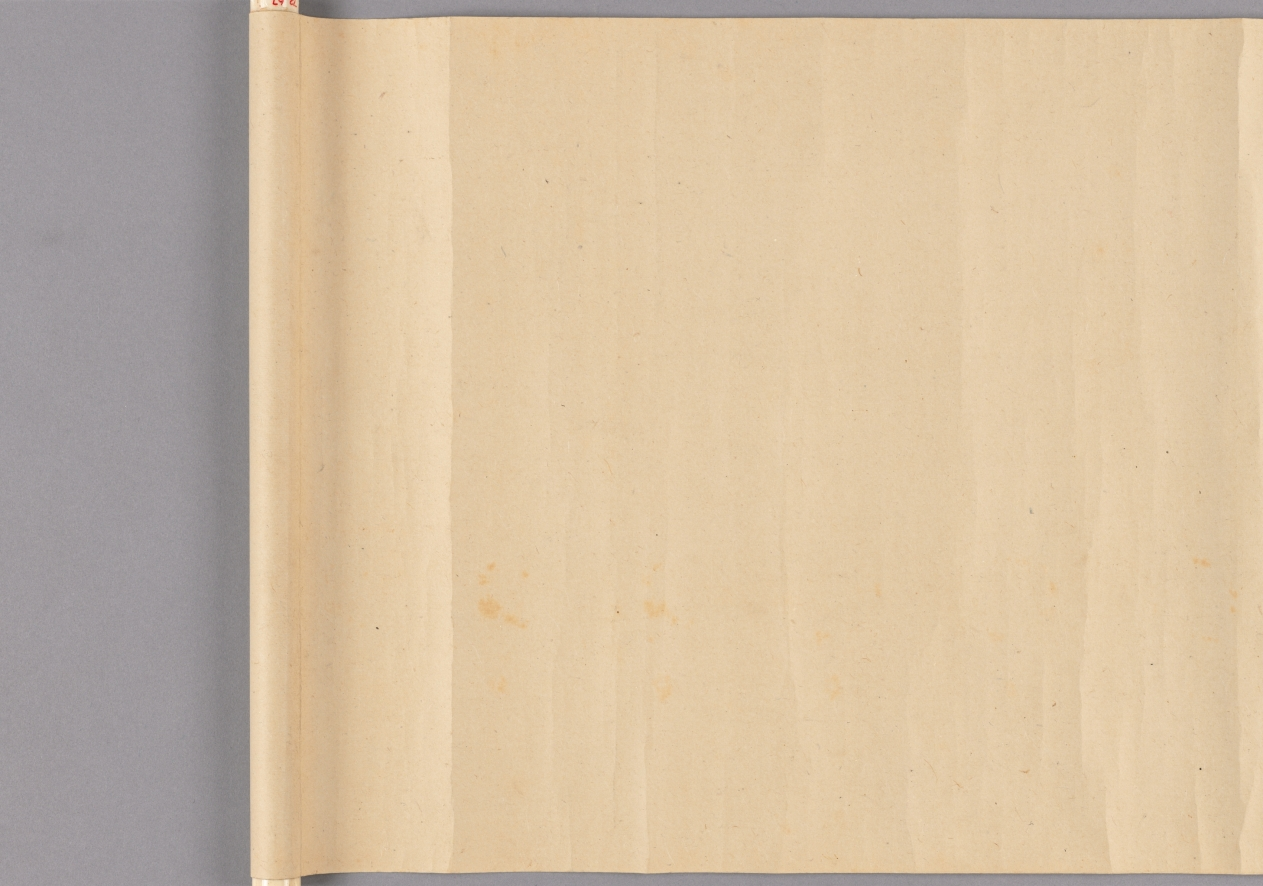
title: Selections from the Collection of Japanese Poems from Ancient and Modern Times (Kokin wakashū) with Design of Pines Along the Shore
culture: Japan, Momoyama period (1573-1615) to Edo period (1615-1858)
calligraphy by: Hon'ami Kōetsu (Japanese, 1558–1637)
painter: attributed to Tawaraya Sōtatsu (Japanese, c. 1570–c. 1640)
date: 1600s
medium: handscroll; ink on silk with gold and silver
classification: Calligraphy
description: The calligrapher and craftsman Hon’ami Kōetsu frequently collaborated with Tawaraya Sōtatsu, a painter who ran a studio that produced fans and screens. Sōtatsu’s work featured abstracted and flattened shapes, fields of color and gold, and asymmetry. In particular, motifs that appeared in small scale, such as flora and fauna, in early decorated Japanese papers were painted in a larger scale—blown up as if seen under a magnifying glass. For this handscroll, Kōetsu brushed poems from the autumn section of a poetry anthology onto silk with a landscape of pines in gold and silver likely painted by Sōtatsu.